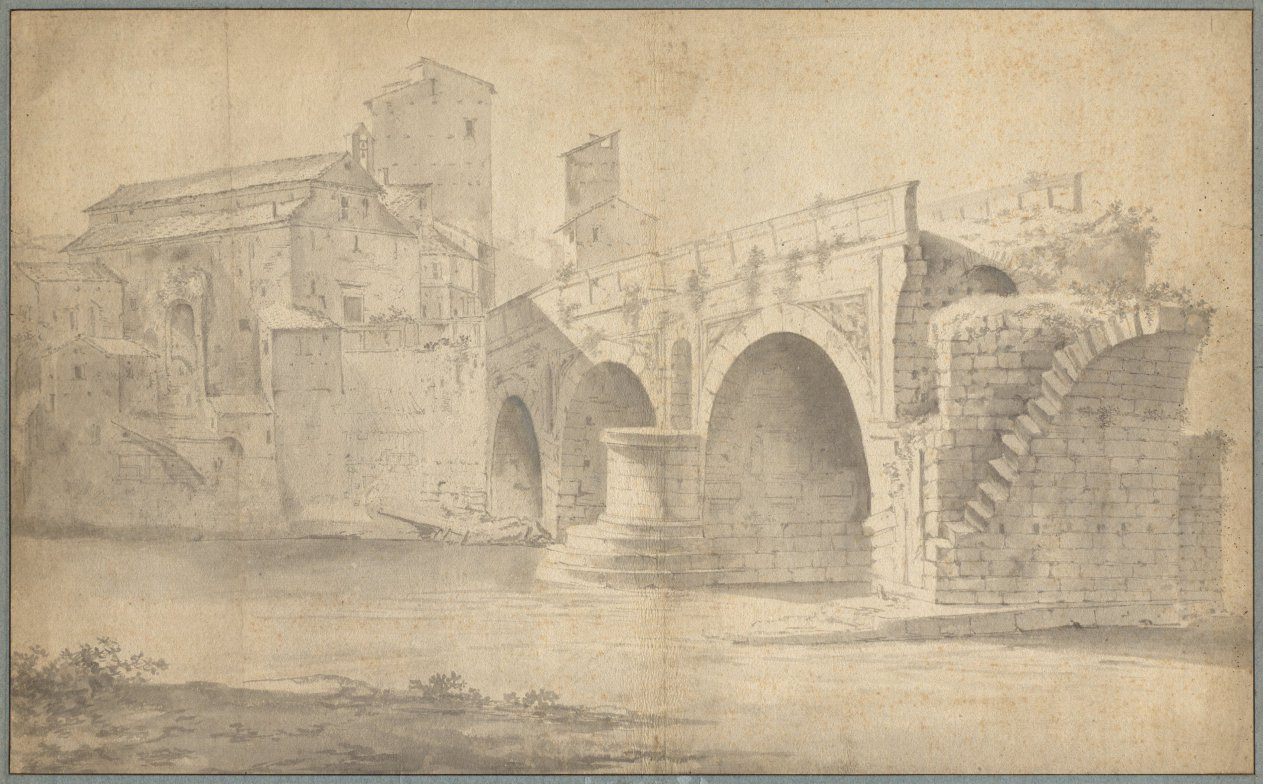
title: View of the Ponte Rotto, Rome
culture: Netherlands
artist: Jan Asselyn (Dutch, c. 1610–1652)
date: 1639/45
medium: brush and gray wash over graphite; framing lines in brown ink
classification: Drawing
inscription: VERSO OF SECONDARY SUPPORT, center, in brown ink: Vue du Ponté Rotte a Rome / Dessineé par Asselin ; center, in graphite: A ; lower left, in graphite: [illegible; partially masked] ; lower right, graphite: USI / legsz ; lower right, in brown ink: J Asselin Nº [illegible; partially masked]